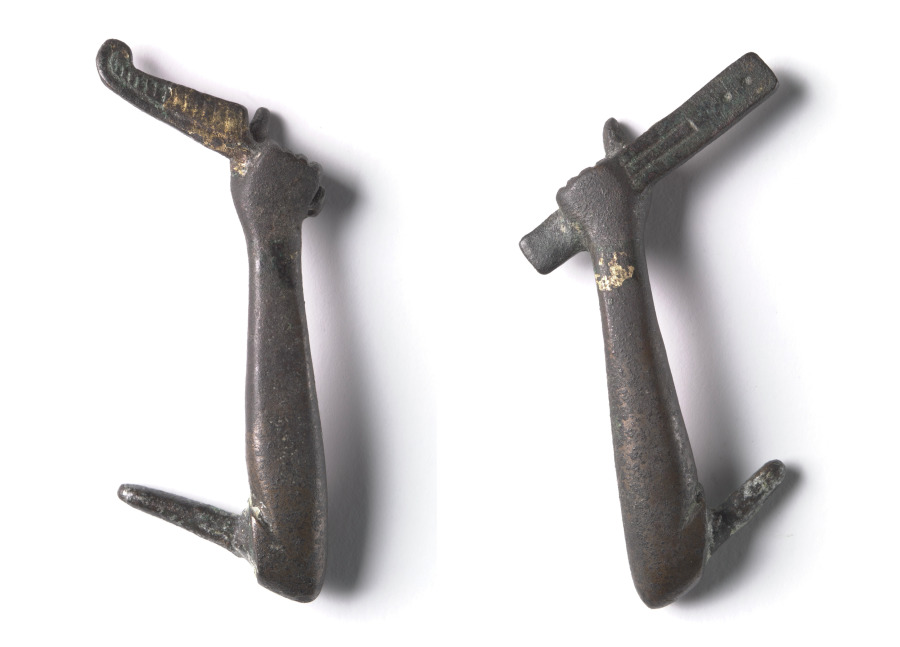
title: Bronze Mount from a "Shawabty Bundle": Pair of Arms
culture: Egypt, Thebes, Wadi Qubbanet el-Qirud, New Kingdom (1540–1069 BCE), Dynasties 18–19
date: c. 1336–1256 BCE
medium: bronze with traces of gilding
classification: Funerary Equipment